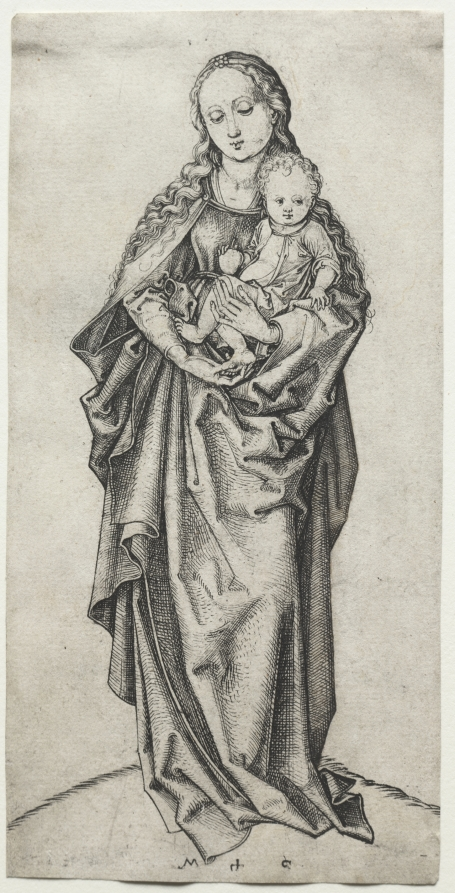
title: Virgin and Child with an Apple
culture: Germany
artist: Martin Schongauer (German, c. 1450–1491)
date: c. 1475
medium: engraving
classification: Print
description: This engraving shows the Virgin and Child on a little mound of earth, resembling a sculpture on a pedestal. The apple held by the infant alludes to the Virgin's status in Catholic theology as the "New Eve," who, by birthing the son of God participated in the possibility of the redemption of humankind from the stain of Eve's original sin. This print, alongside the one of Saint Martin (1924.509) and Saint John the Baptist (1924.510), belong to a series of standing holy figures, never completed by Martin Schongauer, and characterized by isolation of the subject against a blank background.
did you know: The apple held by the child alludes to Mary as the "New Eve."